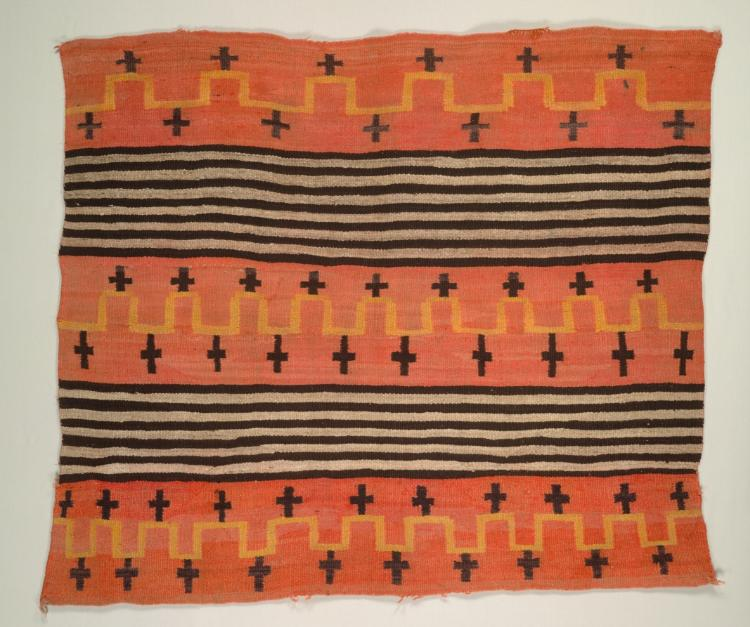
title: Rug (Woman's Wearing Blanket Style)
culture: America, Native North American, Southwest, Navajo, Post-Contact, Early Period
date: c. 1895–1905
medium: tapestry weave: wool (handspun)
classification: Textile